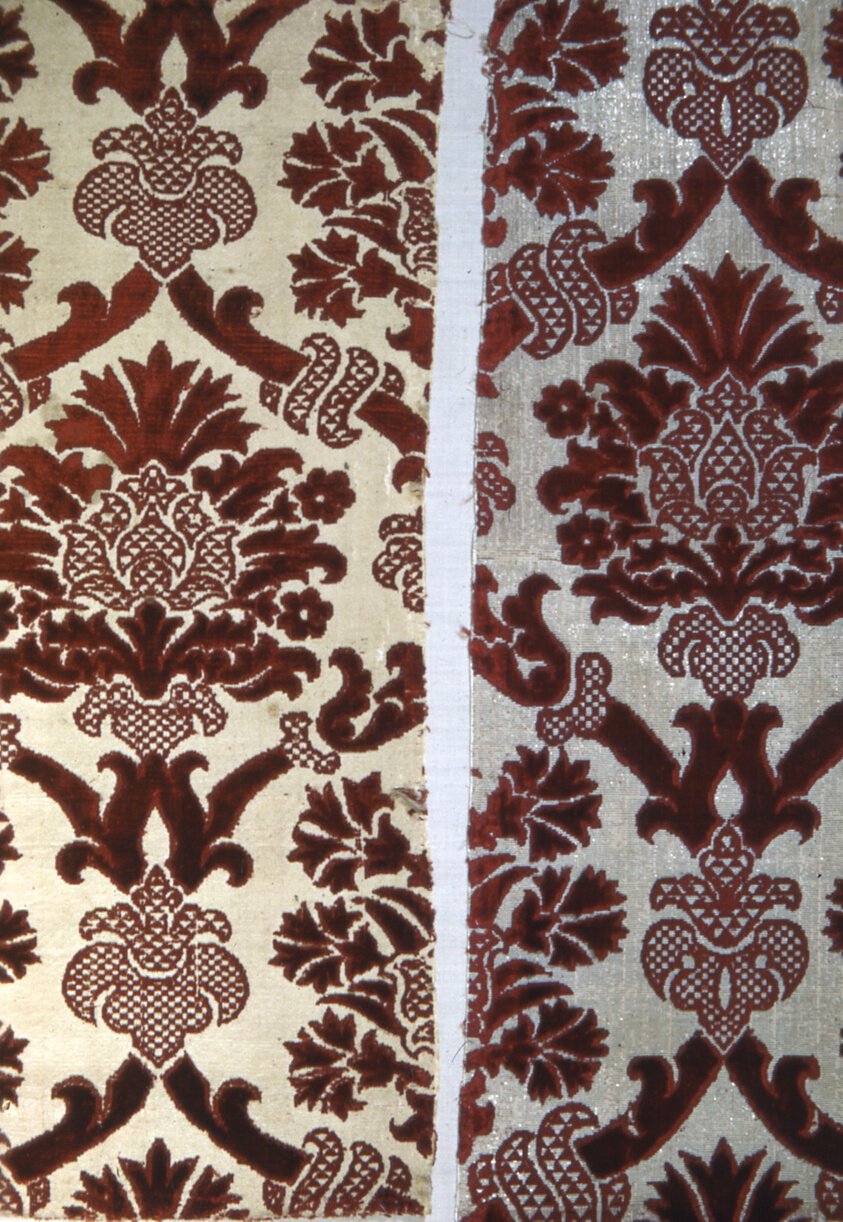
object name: Textile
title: Fragment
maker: Italy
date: 16th century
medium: Cisele voided satin velvet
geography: Italy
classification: textile; weaving - velvet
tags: pomegranates